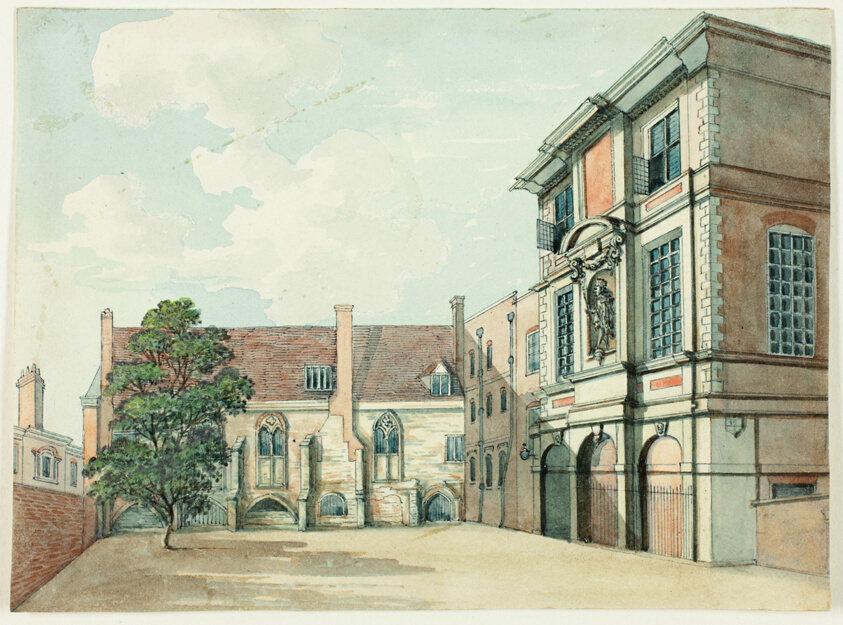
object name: Drawing and Watercolor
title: Remains of the Old Priory and Mathematical School, Christ's Hospital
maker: probably Samuel Ireland (English, active 1782-1800); possibly Charles Tomkins (English, 1757-1823)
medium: Watercolor, with pen and blue ink and touches of pen and black ink, on cream wove paper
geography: England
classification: watercolor; drawings (visual works); prints and drawing